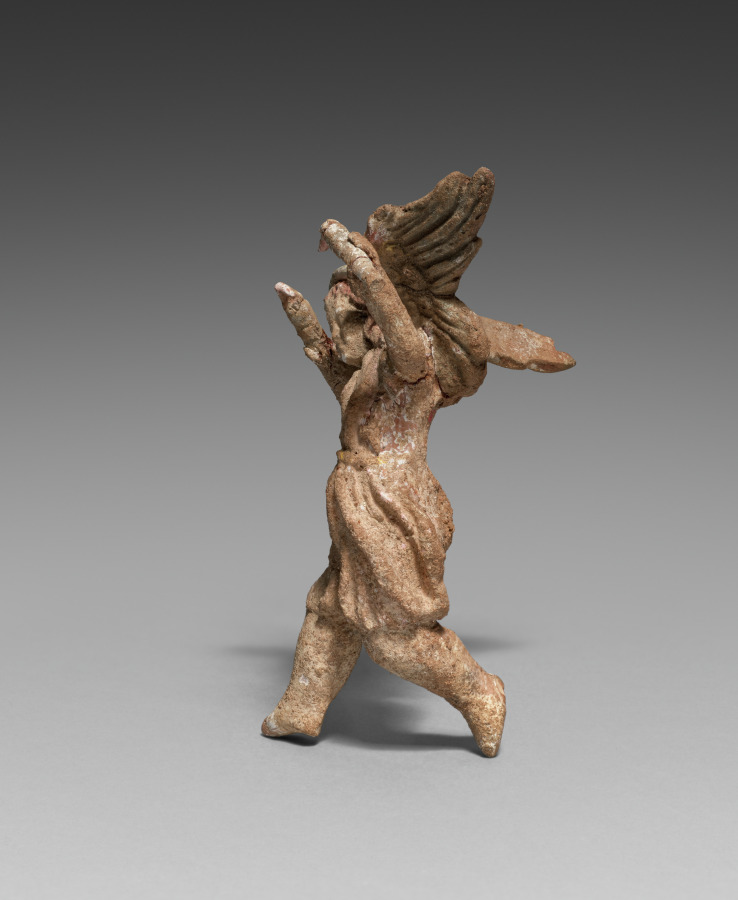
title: Figurine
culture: Greece, Myrina, Hellenistic Period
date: 300–100 BCE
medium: terracotta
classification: Sculpture